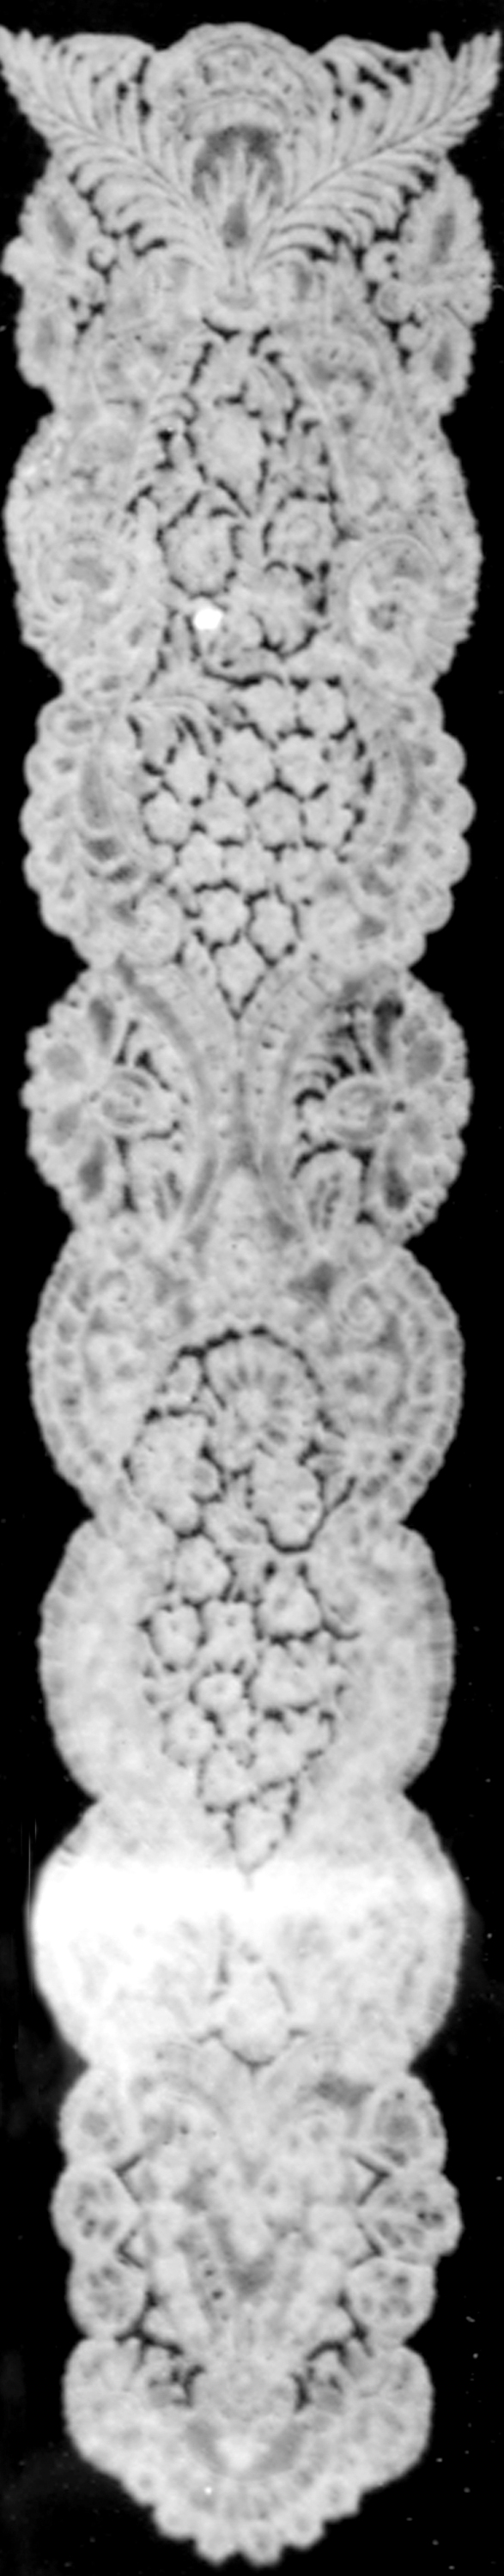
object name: Costume and Accessories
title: Lappet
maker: Flanders, Brussels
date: 1735/40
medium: Linen, bobbin part lace of a type known as "Brussels"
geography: Brussels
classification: costume accessory; lace - bobbin; textile; costume; costume accessory - headdress; costume accessory worn above the waist